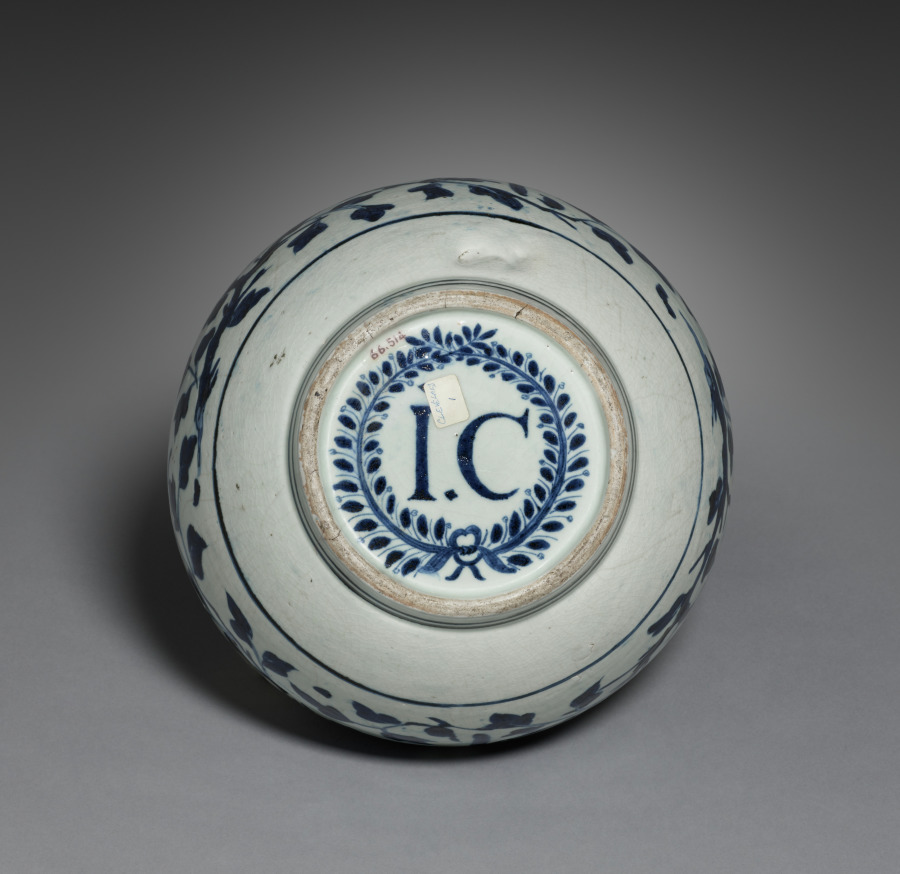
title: Medicine Bottle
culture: Japan, Edo period (1615–1868)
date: 1670s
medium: porcelain with underglaze blue decoration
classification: Ceramic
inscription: "I.C." on bottom (probably made for Joannes Camphuys, 1634–1695).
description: While inspired by medicine jars used in European pharmacies, this bottle was likely decorative. It may have been exported by the Dutch East India Company, a powerful trading company from the Netherlands. In Japan, it operated from Deshima, a man-made island in Nagasaki harbor created in 1636. The initials “I. C.” appear on the base. As the letter J was often transposed with the letter I in Europe of the 1600s, some scholars believe the bottle may have been made for Johannes Camphuys (1634–1695), who was in charge of the Dutch East India Company’s operations in Deshima in 1671.